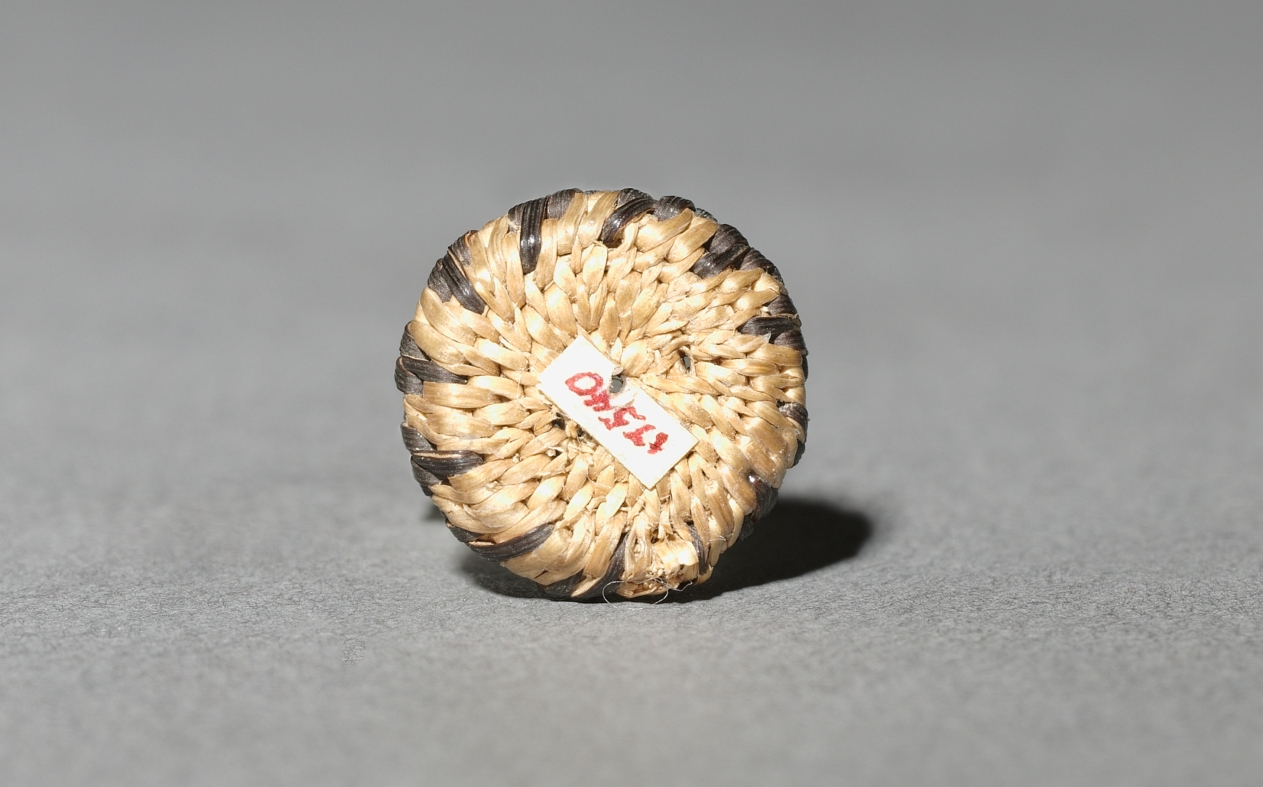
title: Miniature Round Basket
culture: California, Pomo, late 19th-early 20th century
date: late 1800s-early 1900s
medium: plant materials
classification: Basketry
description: Miniature baskets were made to demonstrate the basket-maker’s virtuoso skill, and these tiny marvels seem to be no exception—the smallest are only five millimeters wide but still patterned. For such fine work, dexterity was required as much for preparation of materials as for weaving.